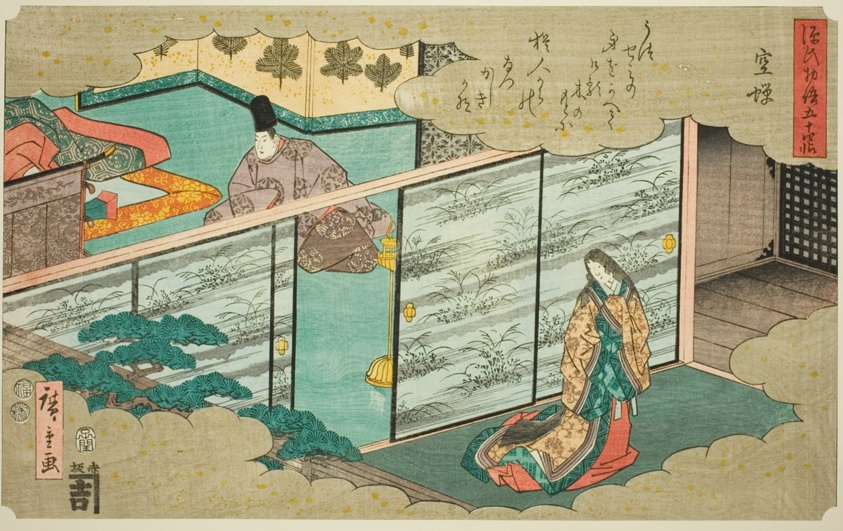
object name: Print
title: Utsusemi, from the series "Fifty-four Chapters of the Tale of Genji (Genji monogatari gojuyonjo)"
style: Japanese (culture or style)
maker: Utagawa Hiroshige 歌川 広重; Japanese, 1797-1858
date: 1852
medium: Color woodblock print; oban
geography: Japan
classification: woodblock print; print; asian art